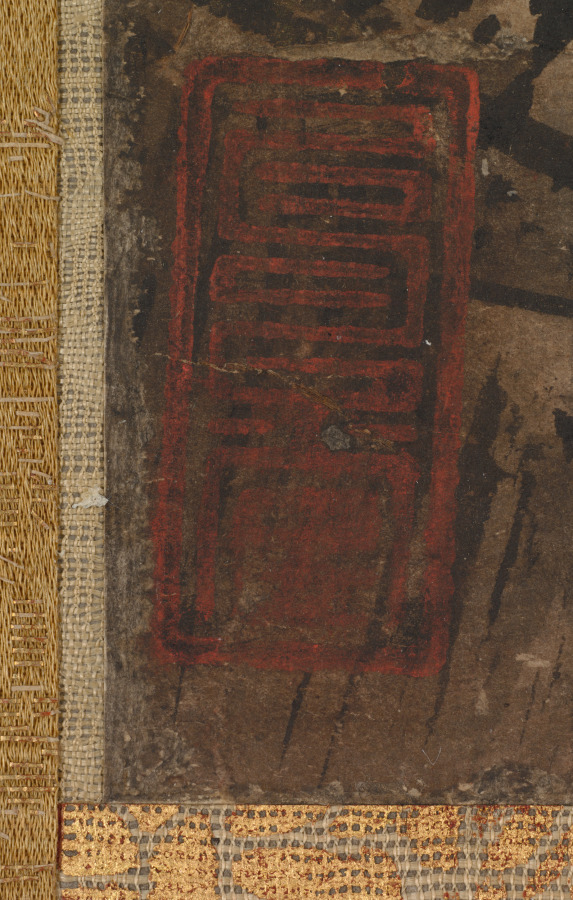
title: Landscape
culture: Japan, Muromachi period (1392–1573)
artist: Judō (Japanese, active 16th century)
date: 1500s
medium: hanging scroll, ink and light color on paper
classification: Painting